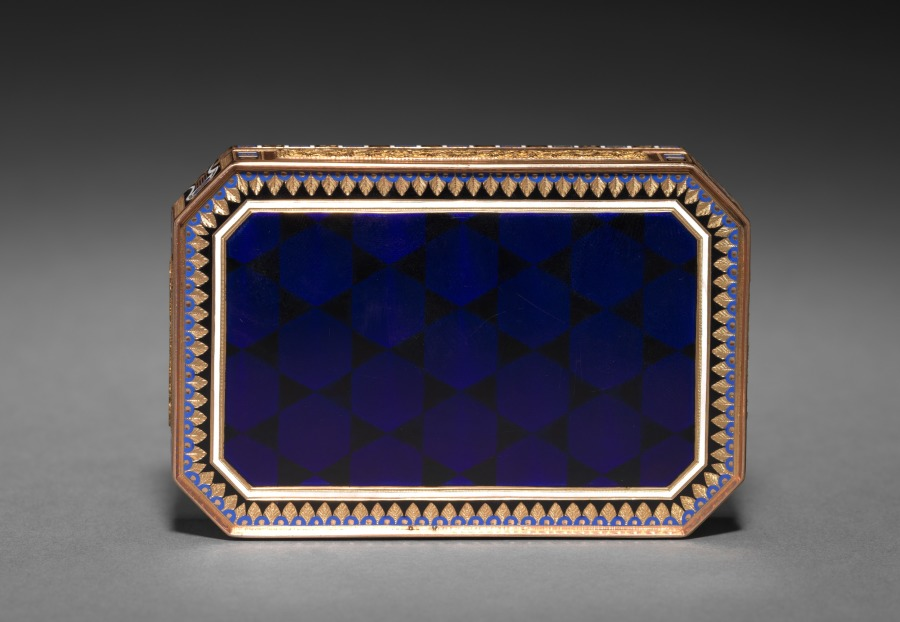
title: Box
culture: Switzerland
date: early 1800s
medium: gold and enamel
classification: Enamel